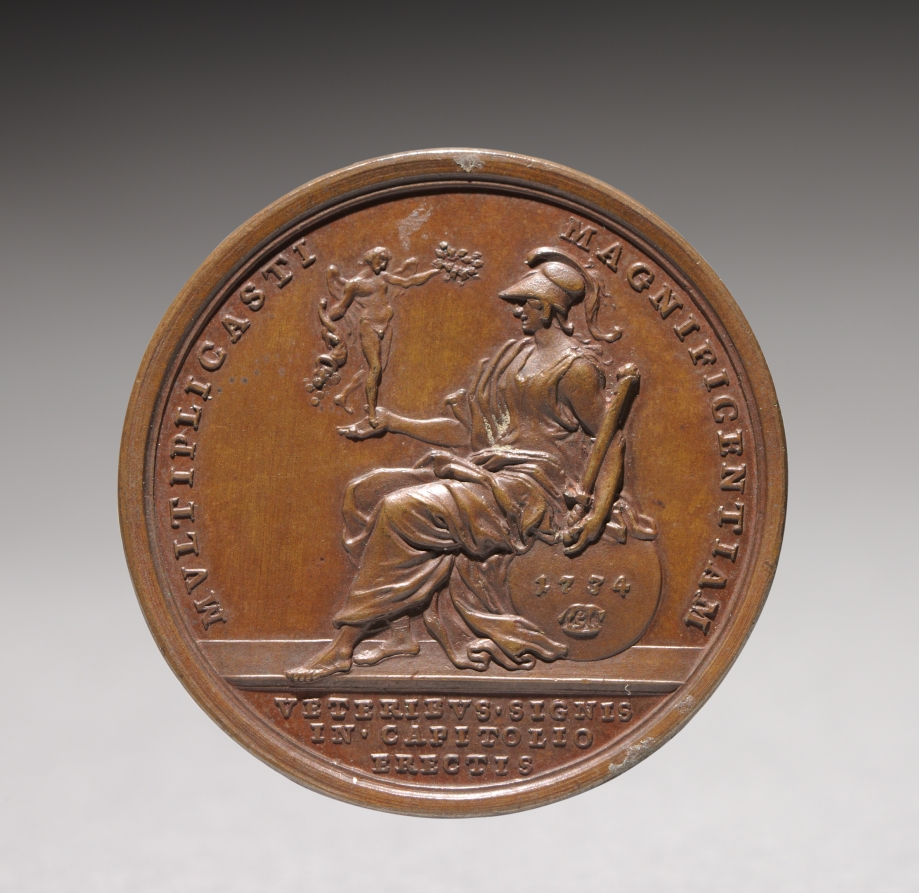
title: Portrait of Pope Clement XII Corsini (reverse)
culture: Italy, Rome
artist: Ottone Hamerani (Italian, 1694–1761)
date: 1734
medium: bronze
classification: Sculpture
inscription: inscribed: MVLTIPLICASTI MAGNIFICENTIAM, 1734, VERTERIBUS.SIGNIS/IN.CAPITOLIO/ERECTUS.